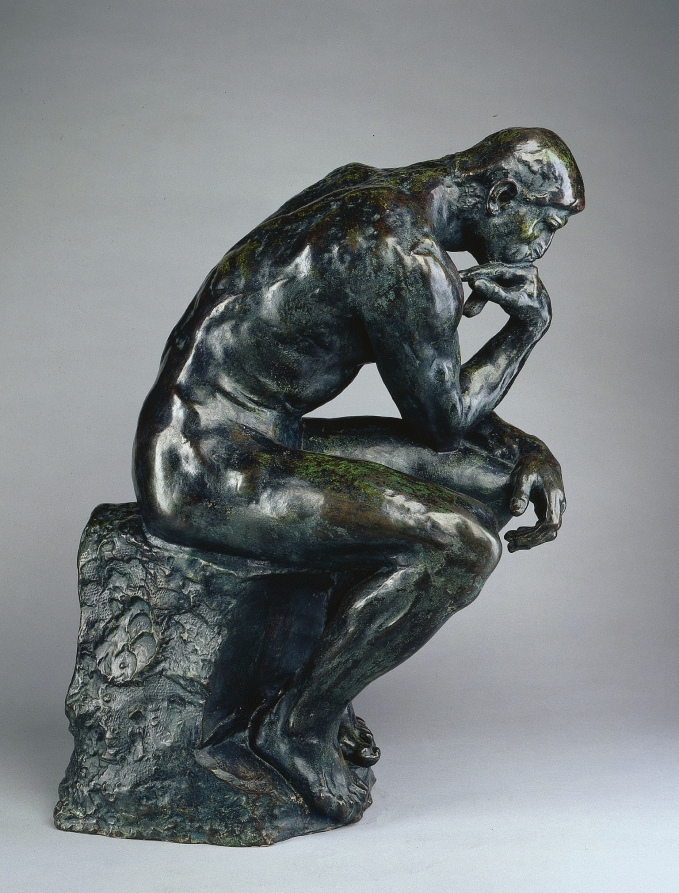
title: The Thinker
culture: France, 19th century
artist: Auguste Rodin (French, 1840–1917)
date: c. 1880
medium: bronze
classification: Sculpture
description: Rodin originally conceived The Thinker as a depiction of the Italian poet Dante Alighieri (1265–1321) sitting in the upper center of a monumental sculptural doorway titled The Gates of Hell (below). Inspired by Dante’s description of a journey through the underworld in his epic poem The Divine Comedy (about 1320), The Thinker contemplates mankind’s fate while gazing at a host of damned figures writhing in anguish below. Stripped of clothing, the figure’s rippling muscles convey an inner, animating life force symbolic of mental activity or creative effort. The figure leans forward, as if ready to spring from his perch, yet seems simultaneously caught in the inaction of deep thought. Rodin produced independent versions of The Thinker, first in this original size and later in a monumental version.